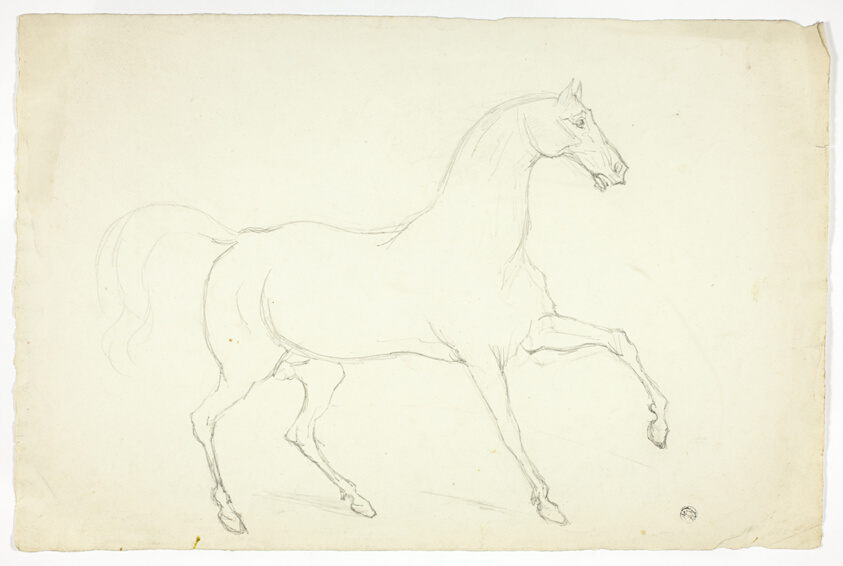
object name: Drawing and Watercolor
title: Stallion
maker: Abraham Cooper (English, 1787-1868); or Sawrey Gilpin (English, 1733-1807)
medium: Graphite on ivory wove paper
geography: England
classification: graphite; drawings (visual works); prints and drawing; paper